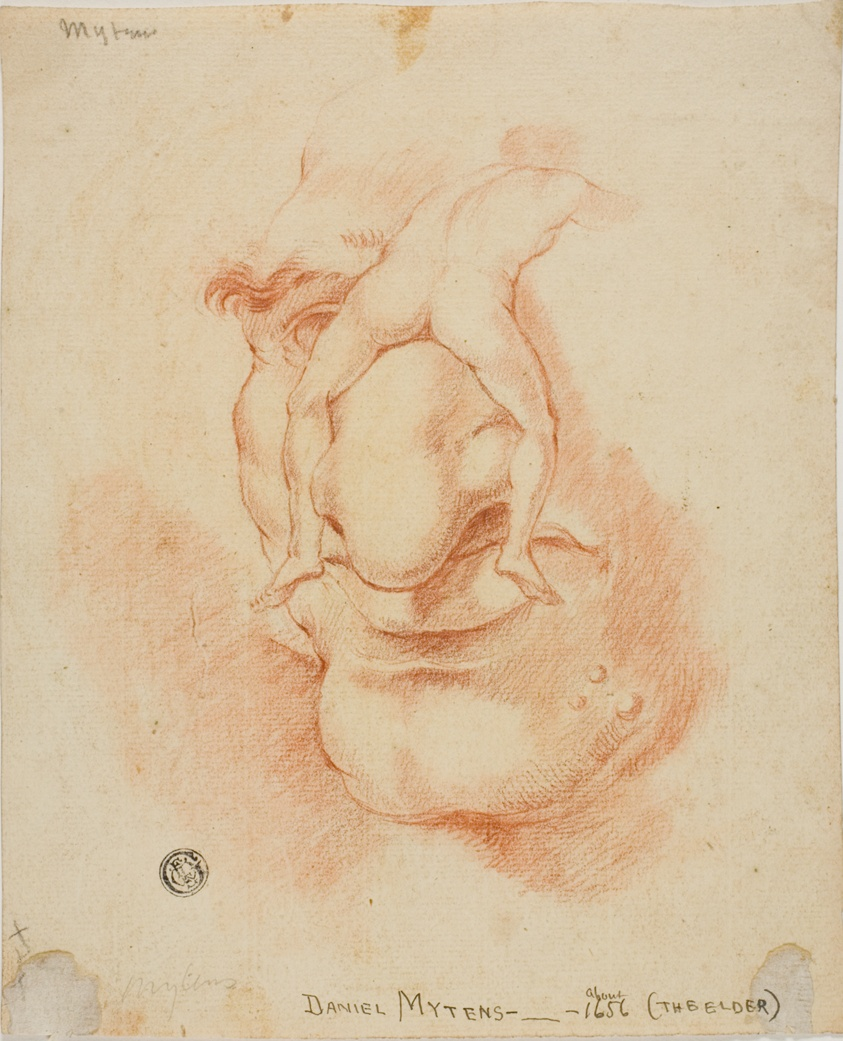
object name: Drawing and Watercolor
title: Allegory of Lust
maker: Attributed to Daniel Mytens, the elder; Dutch, c. 1590-before 1648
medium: Red chalk, with stumping, on cream laid paper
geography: Holland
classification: chalk; drawings (visual works); prints and drawing